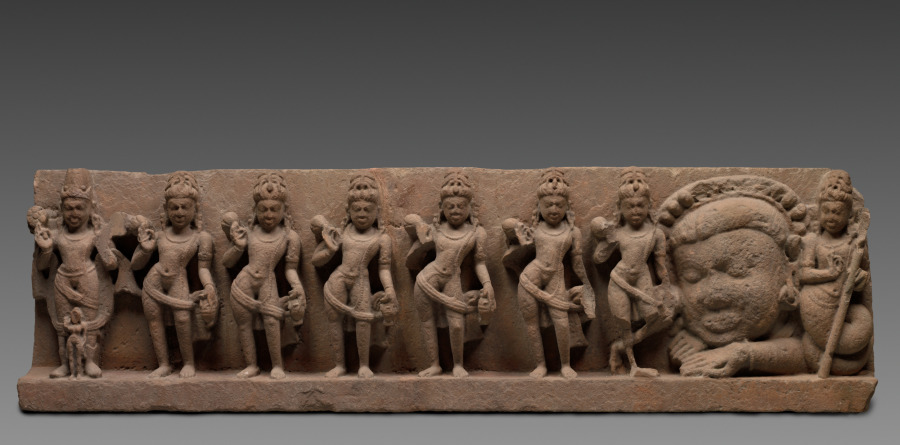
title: Nine Celestial Bodies (Navagraha)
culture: Central India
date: 700s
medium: Sandstone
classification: Sculpture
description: Near temple entrances, the nine celestial bodies were depicted in an orderly row, often in figural form. From left to right they are: Sun with a tall crown and the female Dawn in front of him. The next five figures are nearly identical: Moon, Mercury, Venus, Mars, and Jupiter. As a portent of doom, Saturn was wounded by a goddess to prevent him from moving swiftly, so he stands on one leg. The bodiless head is Rahu, the eclipse, who swallows the moon until it falls out his neck. The serpent-tailed figure is a comet.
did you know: The Sun (Surya) is the only figure who wears boots and holds fully open lotus flowers.